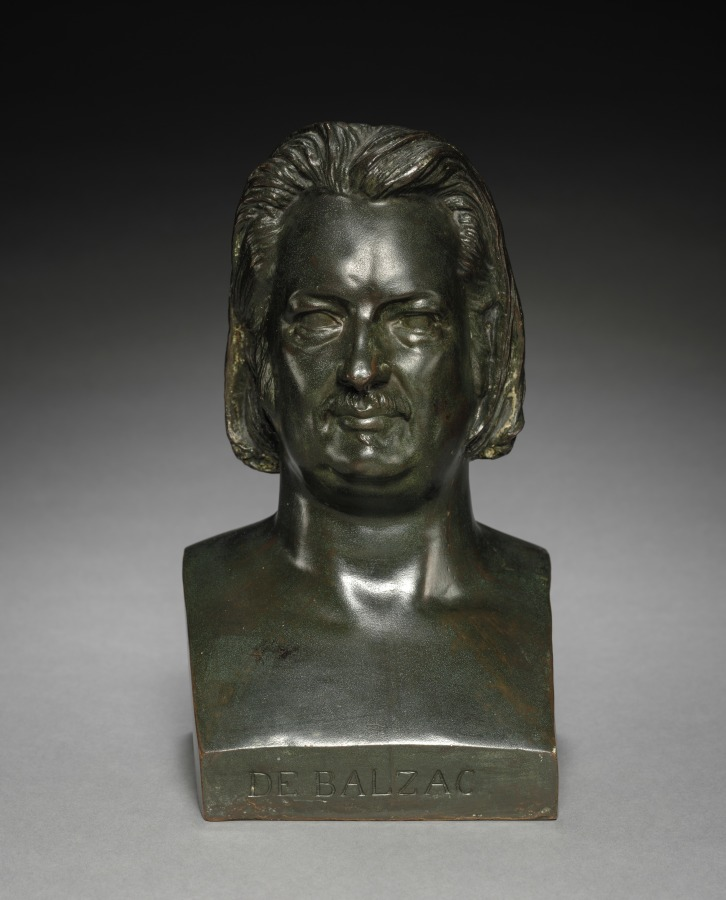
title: Head of Balzac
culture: France, 19th century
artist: Pierre-Jean David d'Angers (French, 1788–1856)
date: 1844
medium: bronze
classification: Sculpture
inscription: inscribed in lower front: "DE BALZAC." The artist's name and date ("DAVID DANGERS/1844") are inscribed on the left side, and the foundry's name ("F. BARBEDIENNE FONDEUR") is inscribed on the back. All inscriptions were made in the mold.